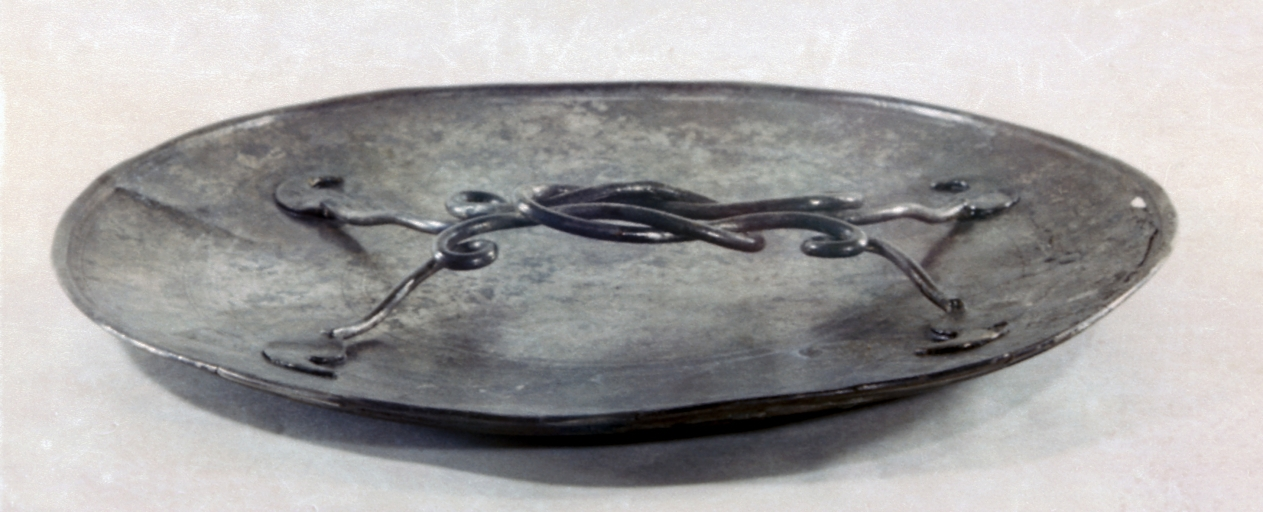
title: Mirror with a Handle in the Form of a Herakles Knot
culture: Byzantium, Syria(?), Byzantine period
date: c. 280–400 CE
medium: silver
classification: Metalwork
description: This type of mirror was introduced throughout the Roman Empire by the 2nd century and remained popular into the 3rd and 4th centuries. Similar examples have been found in Germany and Britain. The handle is made of two thick pieces of silver wire, intertwined to form a Herakles knot--a knot so complex that only someone as strong as Herakles could break it. In antiquity, knots of various kinds were believed to provide protection from harm.